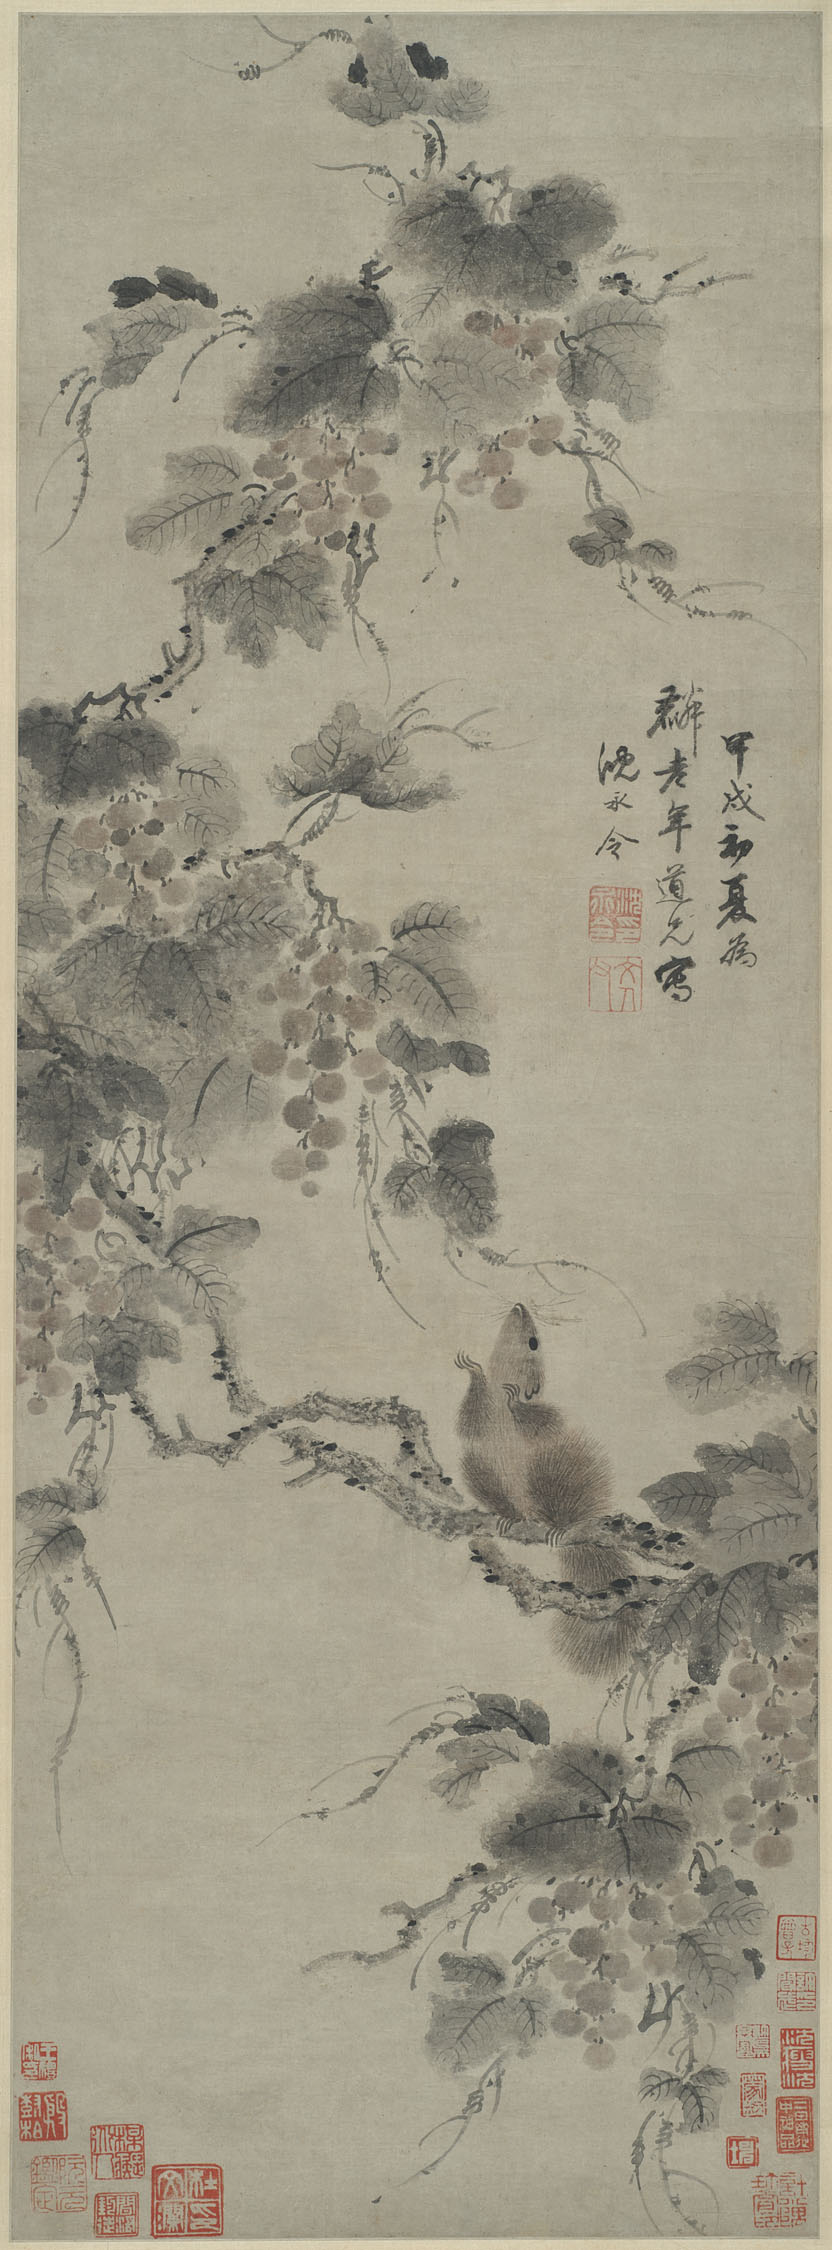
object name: Painting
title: Squirrel and Grapes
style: Chinese (culture or style)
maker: Shen Yongling 沈永令; Chinese, 1614-1698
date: 1694 清朝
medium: Hanging scroll; ink and color on paper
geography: China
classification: hanging scroll; painting